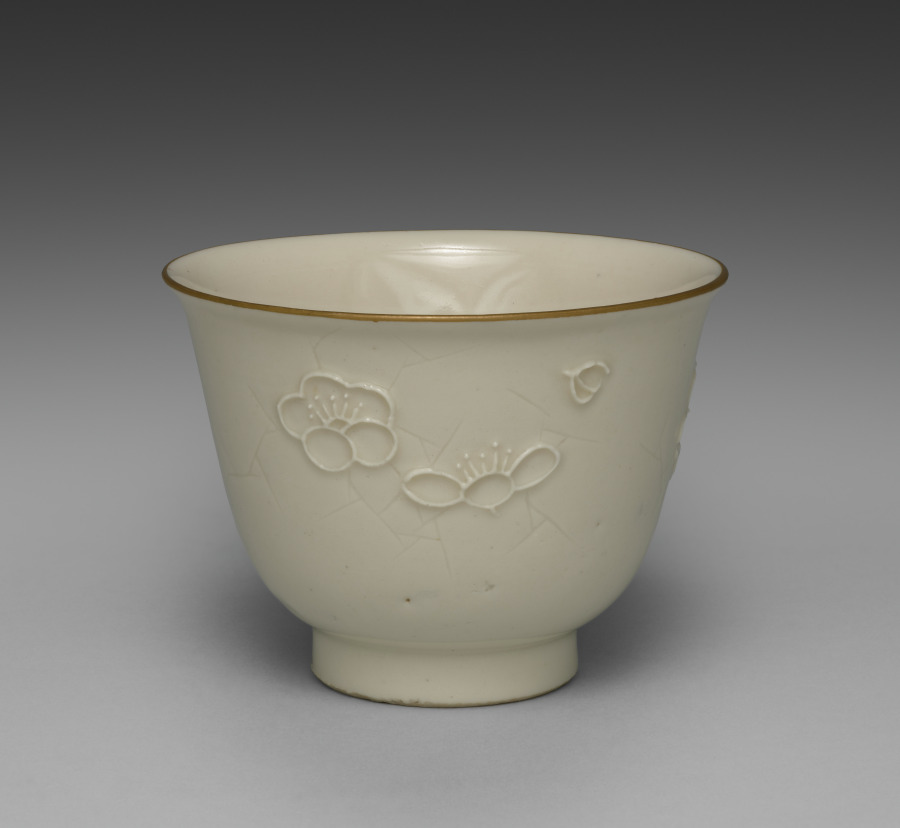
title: Drinking Cup from Dining Set with Plum Blossoms and Cracked-Ice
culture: Japan, Meiji period (1868–1912)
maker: Seifū Yohei II (Japanese, 1844–1878)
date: c. 1875–78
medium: Porcelain with molded designs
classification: Ceramic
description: Each item in this set has a delicate low-relief design of flowering plum branches over scattered, intersecting lines meant to resemble the cracked-ice surface of a frozen body of water and is signed on the base in gold pigment. While Yohei II produced many fine works in underglaze blue, like those produced by Kiyomizu Shichibei, he also made works in quite different styles later in his career, from the early 1870 s. In 1873, he was appointed purveyor to the Industrial Center of Kyoto Prefecture, a designation associated with Kyoto’s efforts to reach an international market through the port of Kobe; and from 1875 until his death, he was involved in national-level projects to present Japanese ceramics across the world. It was during this period that Yohei III was apprenticed to Yohei II, and it has been suggested that this set may in fact be an early example of Yohei III’s work, which he signed with his teacher’s name. Decorated with flowers resembling Japanese textile motifs, the set calls to mind the design of Yohei II’s pair of vases with plum blossoms in the Victoria and Albert Museum. Here, the elaborate trees created for a formal public exhibition setting have been translated into the approachable blossoms of the genteel domestic environment. While the designs are consistent across the pieces, each raised flower petal and pistil and each incised line in the ice was done by hand, so the cups, bowls, and dishes are similar yet unique. The bottoms of two boxes once identified the set’s owner, but the information has been deliberately obscured with black ink. However, inscriptions still visible appear to indicate two occasions, once at the end of July 1886 , and once again in June 1916 , when parts of the set were requested from Hokura in Niigata Prefecture. The location corresponds to a neighborhood in the present-day city of Jōetsu. The surname Tsuji 辻 also appears on a paper tag affixed to one of the box cloths. Future research may possibly reveal more about their provenance. A vase by Yohei III in a private collection combines the formal grandeur of the Yohei II vases in the Victoria and Albert Museum with the gentler design of this dining set, placing flowering plum trees against soft, scalloped-edge clouds resembling those in golden screens.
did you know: The dining wares have a creamy white coloration that the four boxes containing them identify as Korean in style.